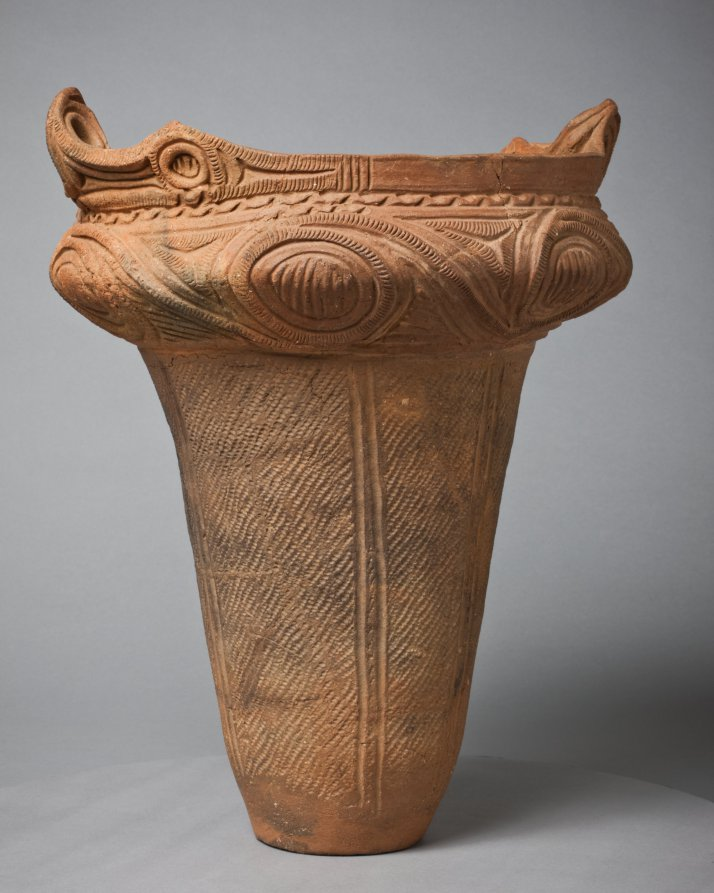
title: Urn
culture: Japan, Jōmon period (c. 10,500–300 BCE)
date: c. 2000 BCE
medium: earthenware, terracotta, impressed and incised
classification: Ceramic